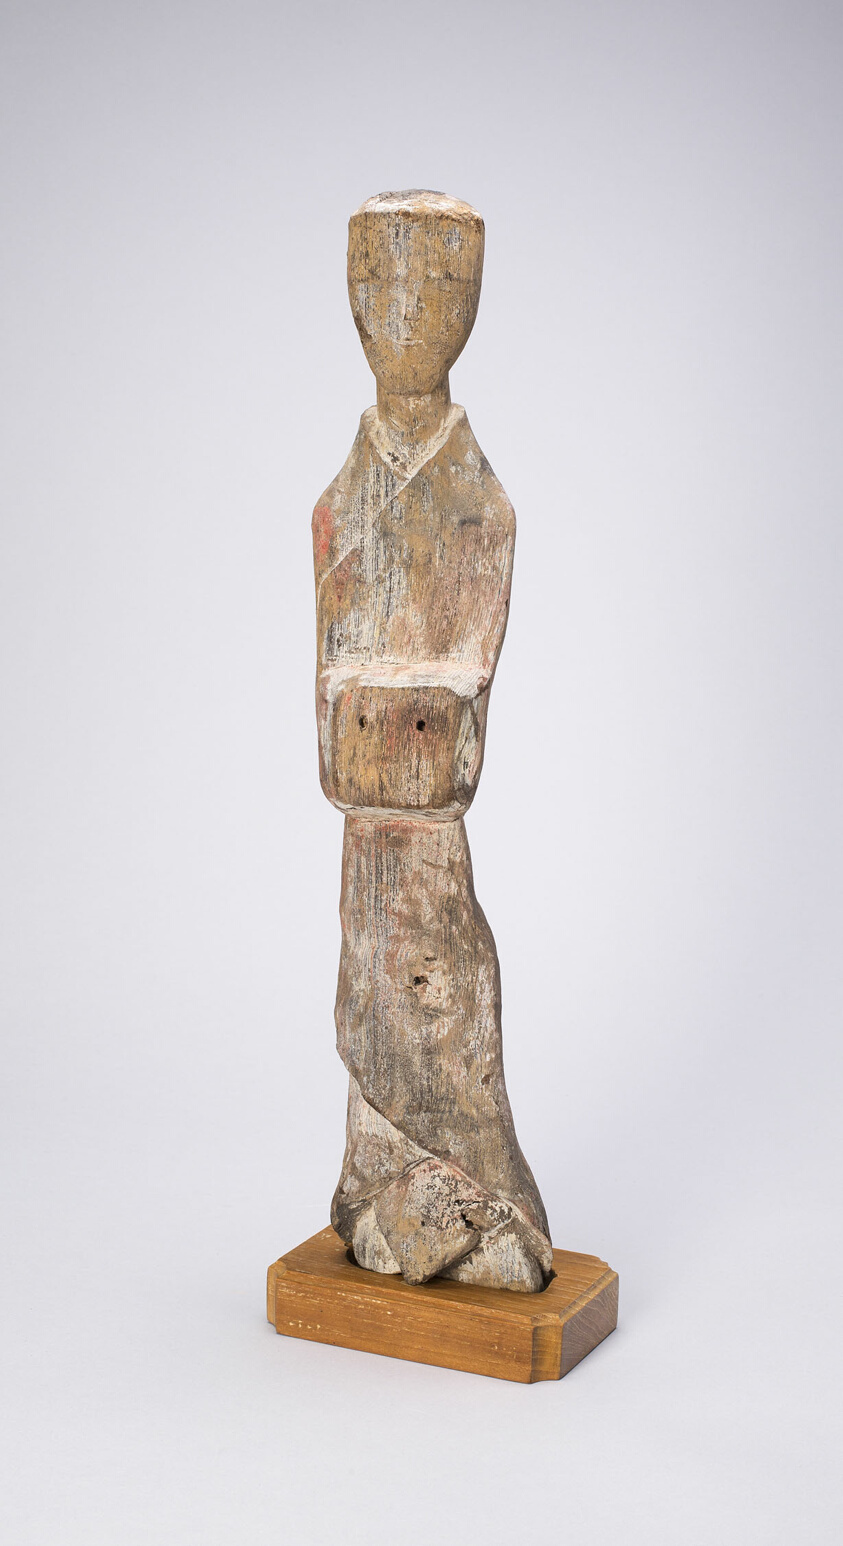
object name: Sculpture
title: Standing Attendant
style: Chinese (culture or style)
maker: China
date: Warring States period (480–221 BCE), 4th or 3rd century BCE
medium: Wood with traces of polychrome pigments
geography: China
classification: wood; sculpture; asian art